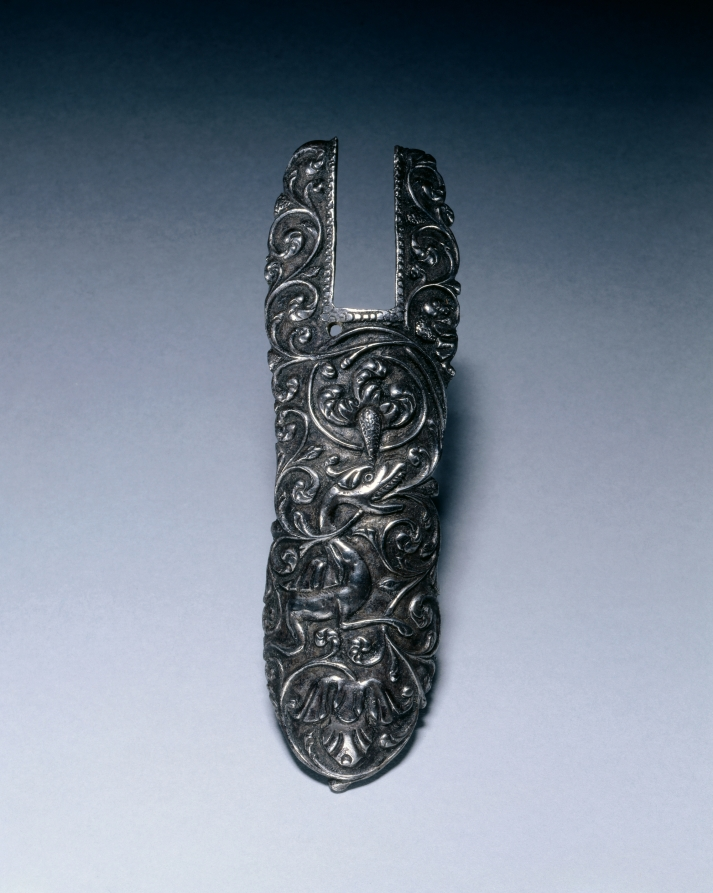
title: Mount for the Upper Stock of a Flintlock Pistol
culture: Italy, Brescia (?), late 17th Century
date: c. 1680–1700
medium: chiseled steel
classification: Arms and Armor